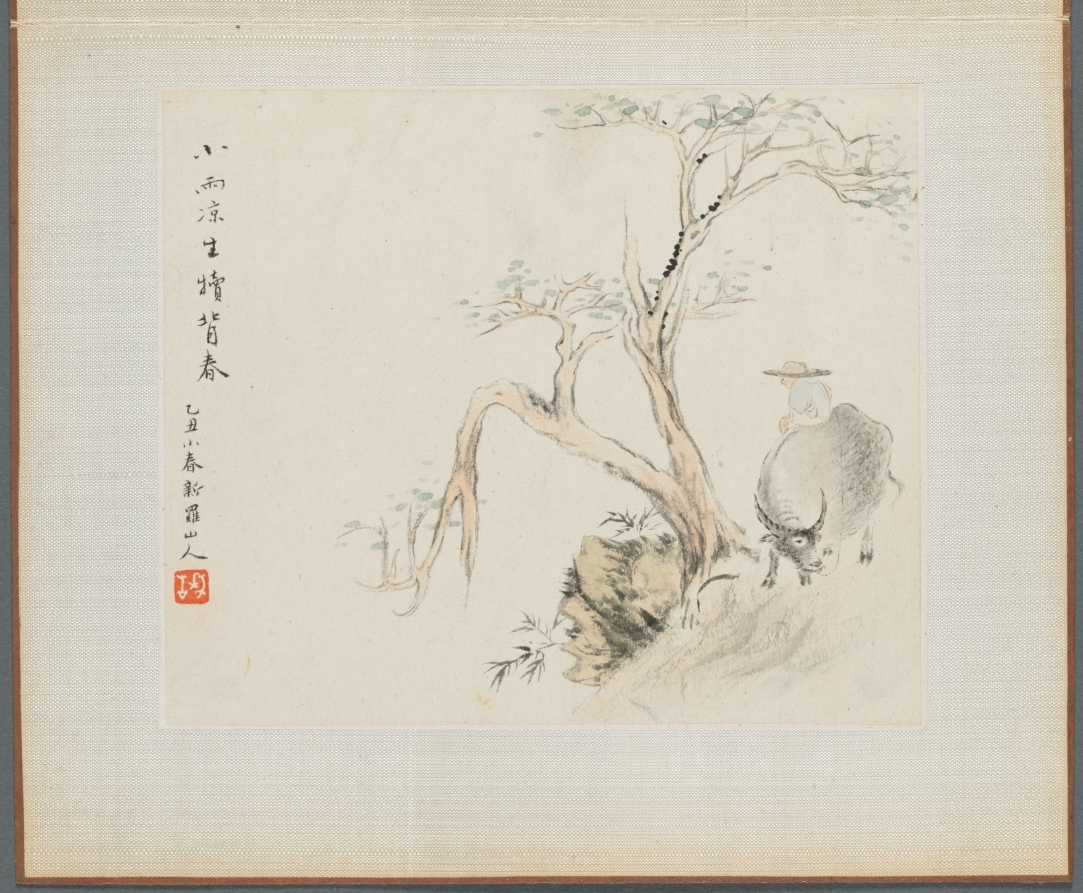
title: Album of Landscape Paintings Illustrating Old Poems: Boy Tending a Water Buffalo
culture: China, Qing dynasty (1644-1911)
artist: Hua Yan (Chinese, 1682–c. 1765)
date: 1745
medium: Album leaf; ink and light color on paper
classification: Painting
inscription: 小雨涼生犢背春 / 乙丑小春新羅山人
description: Hua Yan is one of the Eight Eccentrics of Yangzhou, who rejected Orthodox ideas about painting.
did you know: Tending water buffalos has traditionally been the task of young boys and can still be seen in rural areas of Southern China today.